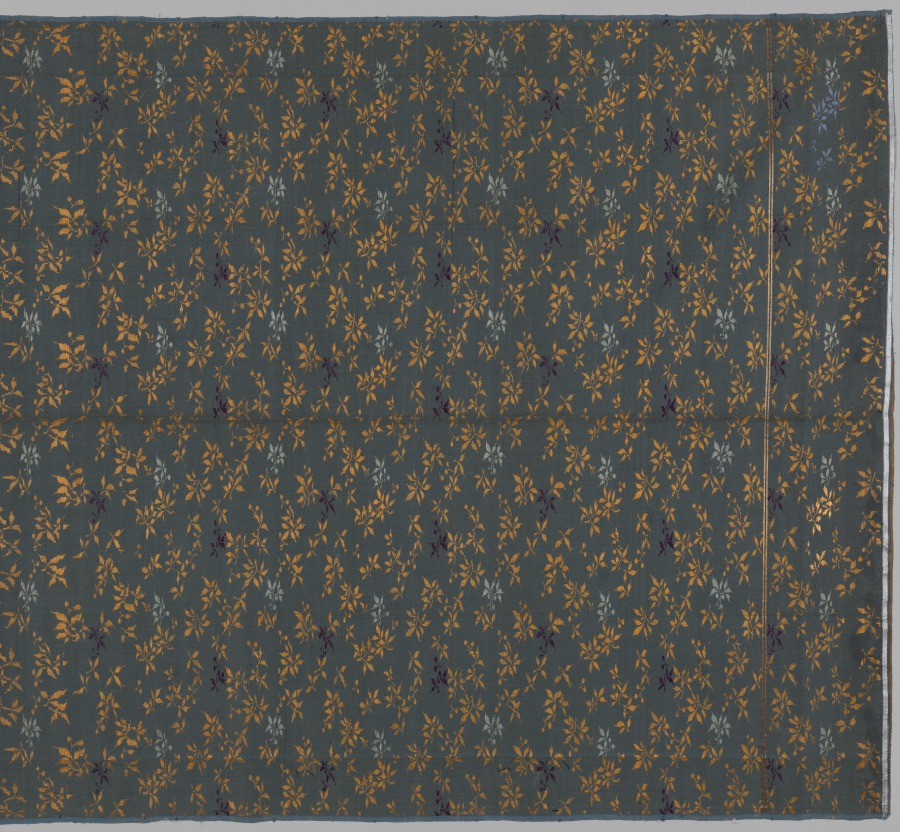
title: Length of Textile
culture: Japan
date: late 1800s–early 1900s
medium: silk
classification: Textile